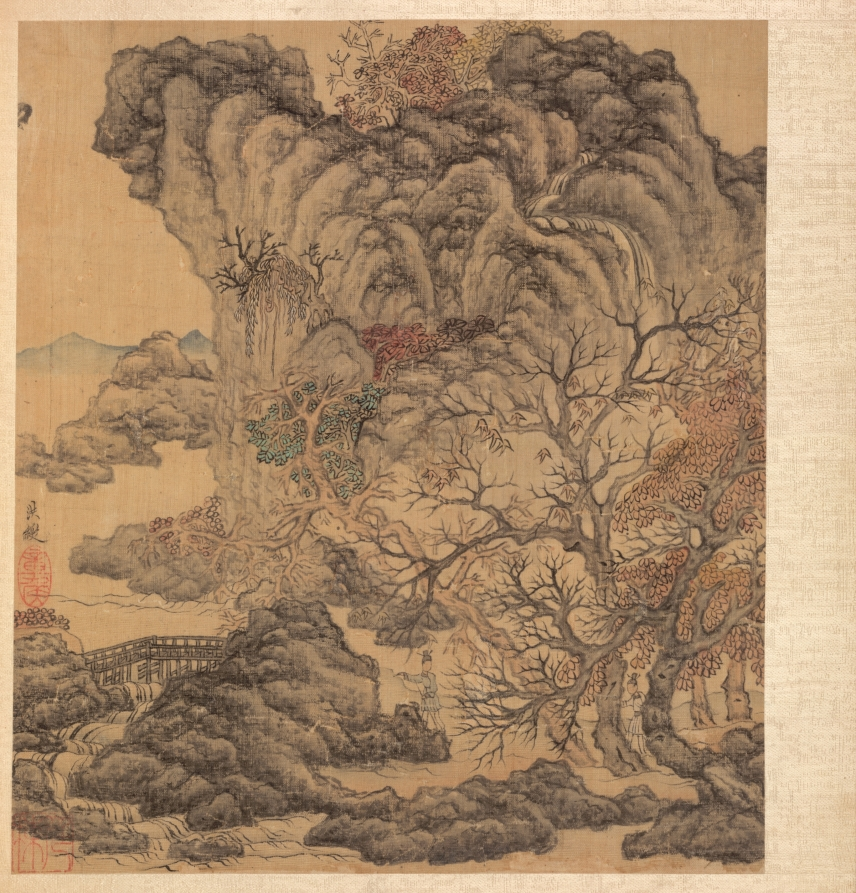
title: Paintings after Ancient Masters:Travelers in an Autumn Landscape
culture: China, Ming dynasty (1368–1644)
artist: Chen Hongshou (Chinese, 1598/99–1652)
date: 1598–1652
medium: album leaf, ink and color on silk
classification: Painting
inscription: Hung-shou [seal] Chang-hou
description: The twenty paintings in this double-album by Chen Hongshou include landscapes, figures, and flowers. It also has one leaf featuring a woman, an often-used subject not found in the other albums from the latter part of his career. His late works are wonderful summations of Chen's peculiar and quirky art--archaistic, hyper-refined--but without accompanying shallowness or sentimentality. His figures and landscapes in the late albums are miniaturized, not unlike the small Chinese gardens, or the carefully selected small table rocks or old roots used for contemplation to see the world in miniature. This loss of scale is quite deliberate and reflects the psychological situation of a depressed class like the Ming loyalist officials and scholars, deprived of their integrity and honor, and forced to lead a diminished and restricted existence.